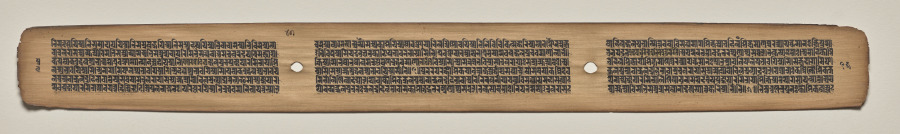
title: Text, Folio 45 (verso), from a Manuscript of the Perfection of Wisdom in Eight Thousand Lines (Ashtasahasrika Prajnaparamita-sutra)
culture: Eastern India, Bihar, Vikramashila Monastery. Painting: Nepal, Kathmandu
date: Sunday, September 14, 1119 (year 239 of the Newar Samvat in the month of Ashvina)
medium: gum tempera and ink on palm leaves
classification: Painting